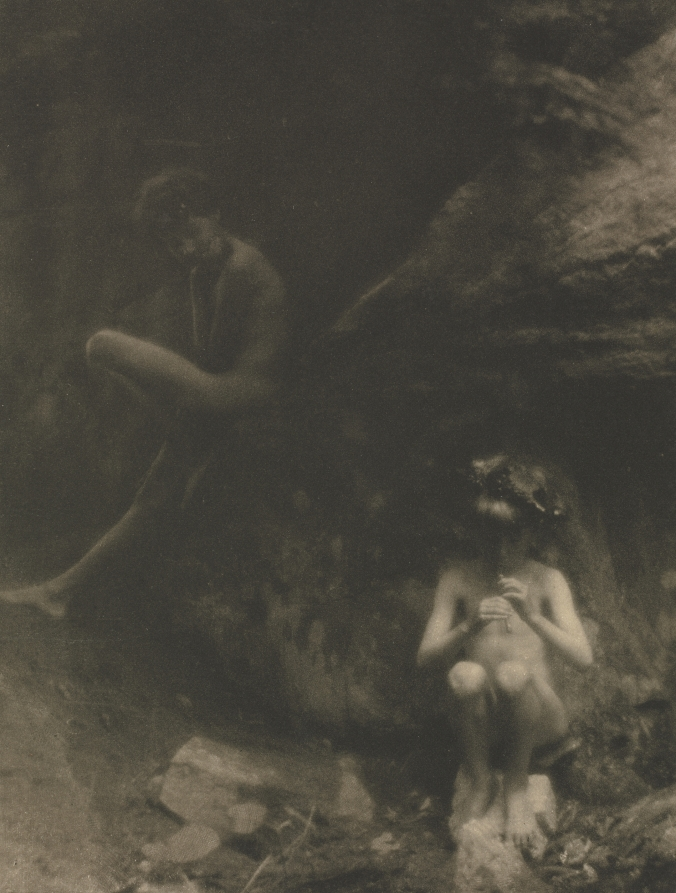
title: Camera Work: The Pipes of Pan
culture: America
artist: Clarence H. White (American, 1871–1925)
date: 1908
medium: photogravure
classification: Bound Volume